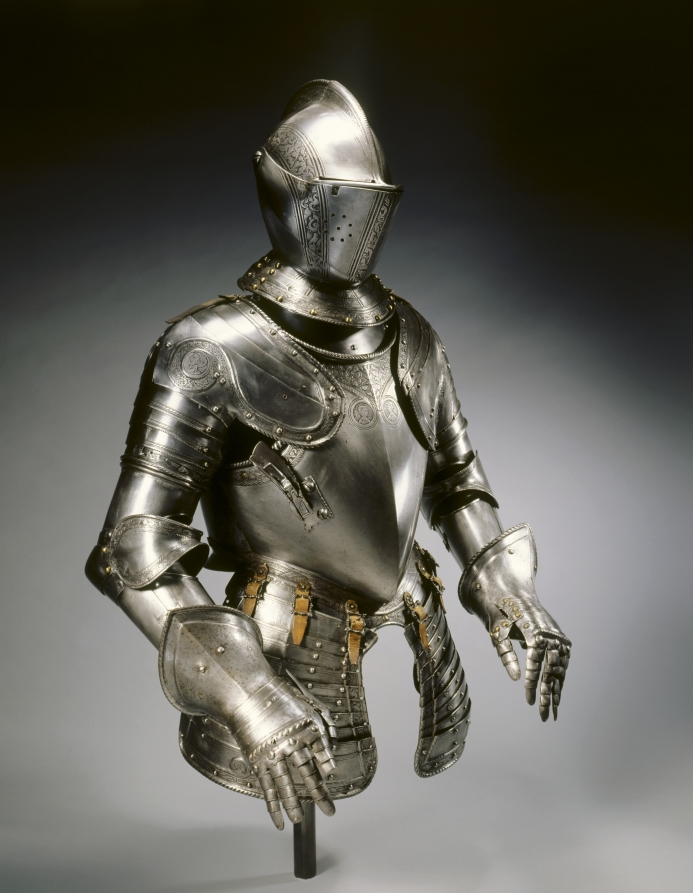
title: Half-Suit of Armor for the Field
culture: North Italy, Brescia (?), 16th century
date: c. 1575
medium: steel with etched decorative bands and roundels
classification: Arms and Armor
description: Decoration was critical to fine armor, and etching was the most commonly used technique. Here, the bands along the borders are etched. On the breastplate, pauldrons (shoulder guards), and tassets (hip and upper leg guards), etched medallions enclose profile busts reminiscent of ancient Roman portraits. The lance rest on the breastplate indicates that this half-suit was once part of a complete field armor for man and horse. The etching technique used for armor was developed in the late 1400s. The metal surface was first coated with an acid-resistant substance, such as wax or varnish. An etching needle was then used to scratch a design into the surface. The exposed areas were then treated with an acid that would "bite" or etch the lines into the metal. When the coating was removed, the etched design was blackened for contrast.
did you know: This is an example of raised field etching where the design stands out in slight relief from the background.